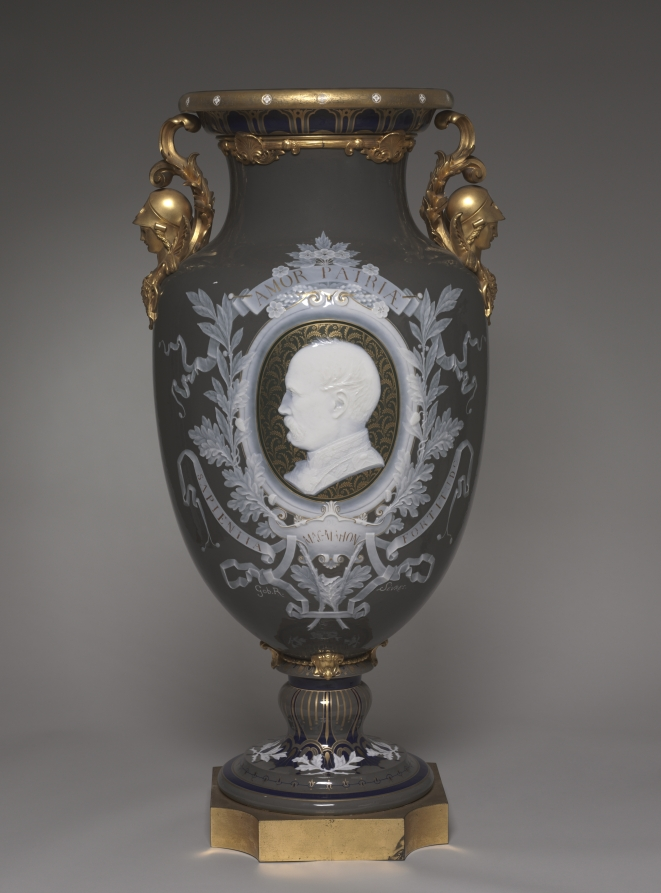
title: Vase with Portrait of President MacMahon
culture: France, 19th century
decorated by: Alfred-Thompson Gobert (French, 1822–1894)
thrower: Constantin Renard (French)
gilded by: Emile-Bernard Rejoux (French, 1832-)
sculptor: Jean-Denis Larue (French, 1884)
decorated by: Jules Archelais (French, 1865–1902)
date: c. 1872–1874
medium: porcelain with gilt bronze mounts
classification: Ceramic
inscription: incised gilded letters located directly below portrait relief: "MACMAHON"; incised gilded letters located in complex design of ribbons above portrait: "AMOR PATRIA," and below: "SAPIENTIA," "FORTITUDO"; on primary face, beneath the ornamental surround of MacMahon's portrait: "Gob. R/Sèvres"; on reverse, incised gilt numerals located within ornamental ribbon: "1873"; incised in the porcelain inside neck: "CR 72 6" and beneath it "CR 72 9"; incised letters beneath the vase: "NL"; a small gilt-metal bucket is installed within the neck of the MacMahon Vase, on its bottom are scratched the letters: "ABF"; printed in green inside the neck and beneath the vase: "s 74"; printed in red on the lip: a circular stamp with the words "Decore a Sèvres 74" surrounding the initials "RF" [Repbulique Français].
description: Marie Edmé Patrice Maurice de MacMahon (1808-1893), whose portrait appears on this vase, was its first owner. He was a successful military leader who was given the titles of Duke of Magenta and Marshall of France by Napoleon III, but after France's defeat in the Franco-Prussian War of 1870-71 and the end of the Second Empire, MacMahon was elected second President of the Third Republic of France.